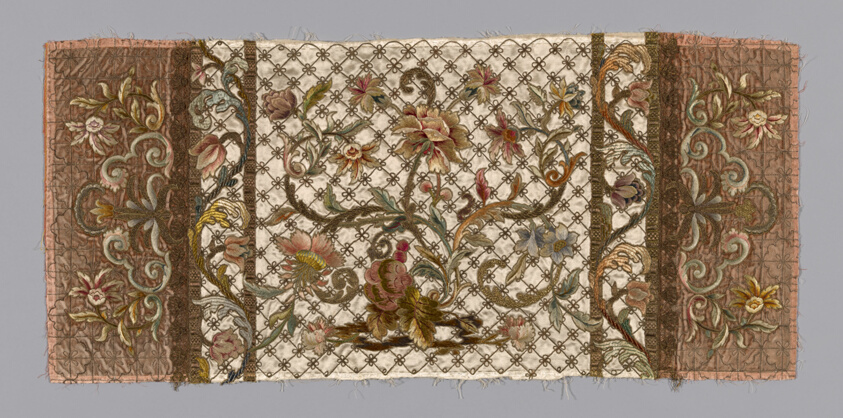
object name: Textile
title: Cover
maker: Italy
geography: Italy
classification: textile; needlework (visual works)